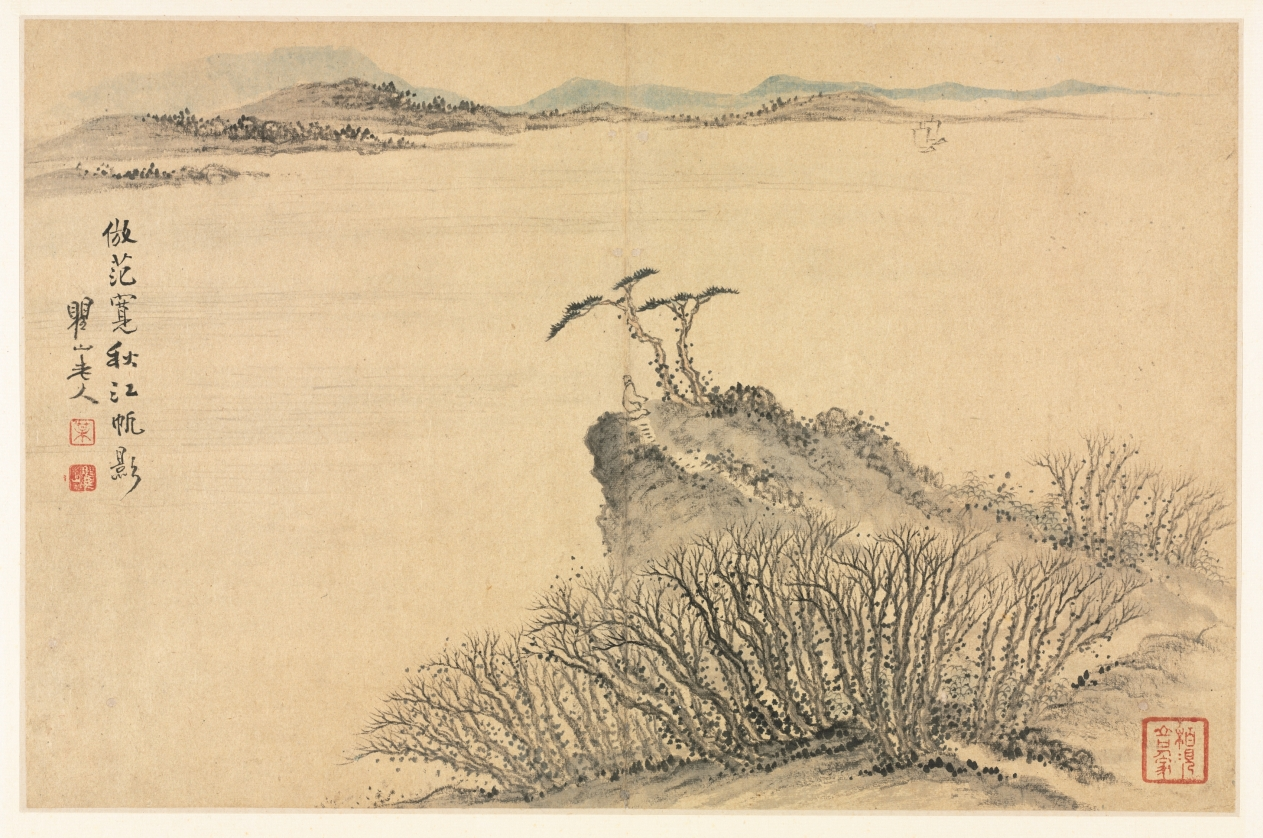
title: Landscapes in Various Styles after Old Masters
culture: China, Qing dynasty (1644-1911)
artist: Mei Qing (Chinese, 1623–1697)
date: 1690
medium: album leaf: ink and color on paper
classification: Painting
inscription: Autumn Leaf III (formerly Leaf H). Artist's inscription, signature, and seal: Imitating Fan Kuan's "Sailing on the Autumn River." Qushan laoren [2 seals] Mei; Qushan [seal, lower right corner] Bo jian shan kou ren jia.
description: This leaf presents a rising promontory in the near distance, whose base is hidden by a dense grove of barren, autumnal trees. A gentle incline emerges from the lower right, with a small path leading to its summit, where a gentleman is sheltered from the wind by two pines. This promontory resembles Guangming Ding 光明頂 (Summit of the Bright and Luminous), the second tallest peak in Huangshan 黃山 (Mt. Huang or Yellow Mountain), the scenic area that inspired much of Mei Qing’s artistic production. Instead of looking down on the “Sea of Clouds,” though, as one who scales Huangshan’s peak would, this gentleman is looking out at two boats on an actual sea.